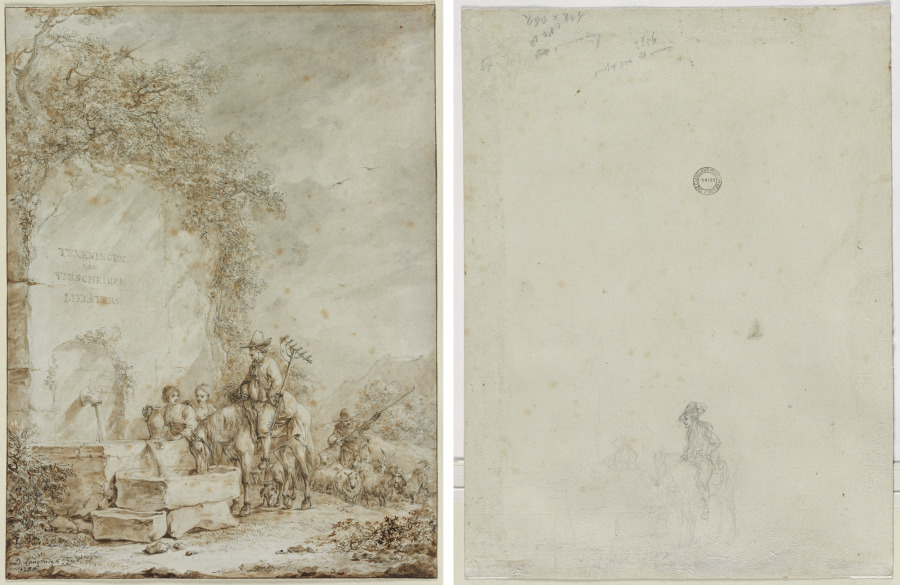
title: Frontispiece for an Album of Drawings: Peasants at a Fountain (recto); Sketch of Peasants at a Fountain (verso)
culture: Netherlands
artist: Dirk Langendijk (Dutch, 1748–1805)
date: 1784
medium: pen and black ink and brush and brown and gray wash over graphite; framing lines in black ink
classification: Drawing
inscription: signed, lower left, in black ink: D. Langendyk Fecit / 1784 ; by artist, center left, in graphite reinforced with brush and brown wash: TEKENINGEN / VAN / VERSCHEIDEN / MEESTERS [=Drawings by Various Masters]